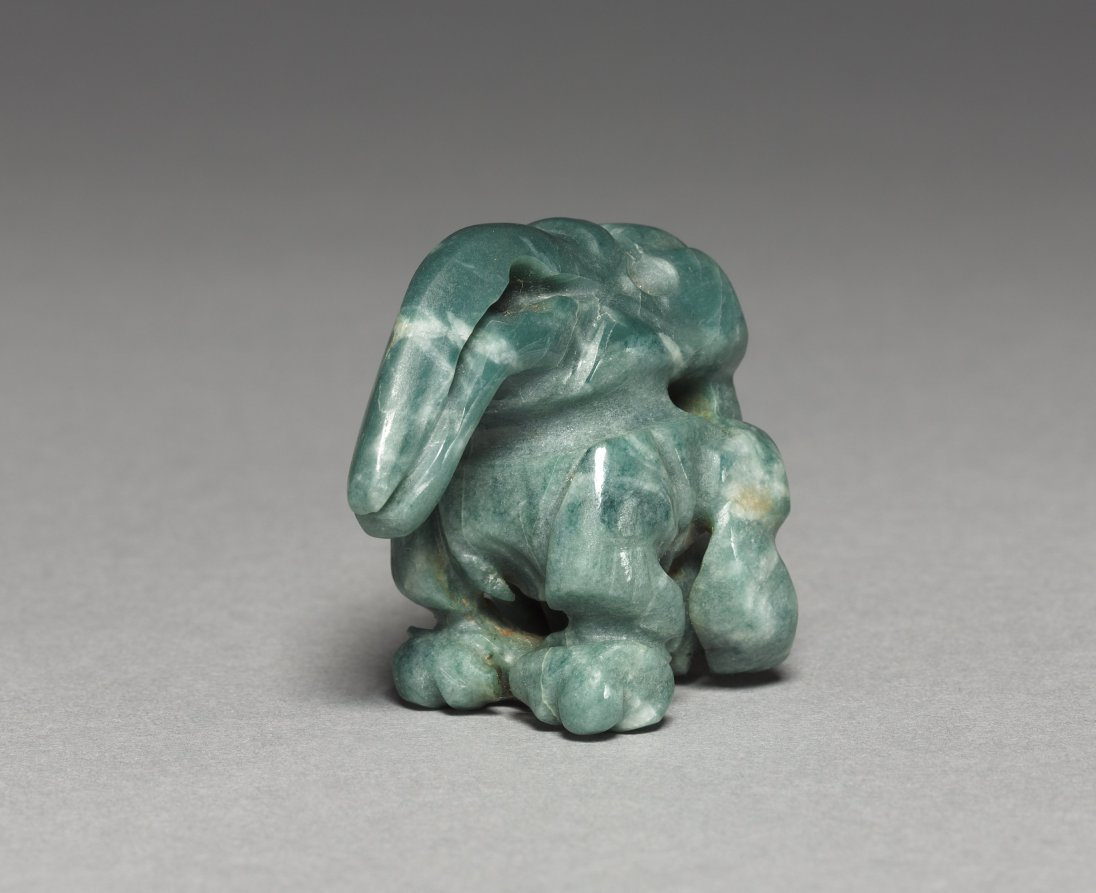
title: Bird Pendant (Buzzard or Vulture?)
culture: Costa Rica, Atlantic Watershed region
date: c. 300 BCE–600 CE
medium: jadeite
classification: Jewelry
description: Before about AD 500, when gold-working technologies were adopted in Costa Rica, jade was the quintessential luxury material and it was masterfully carved into exquisite ornaments of many kinds. Ancient Americans did not use many metal tools, and artists carved jade, a tough stone, with implements of stone, bone, bamboo, or reed.